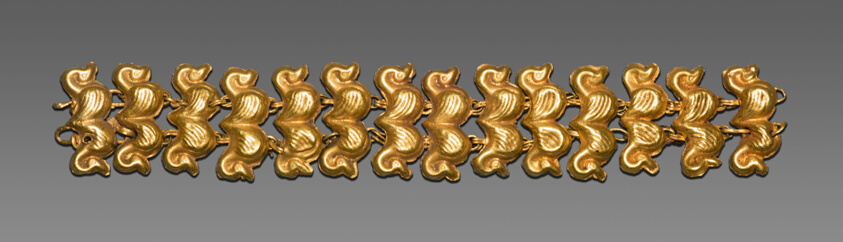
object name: Costume and Accessories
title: Fragment of a Necklace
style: greco-roman (egyptian), ancient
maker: Roman; probably Egypt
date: 3rd century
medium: Gold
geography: Roman Empire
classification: necklace; gold; fragment; metal; jewelry; ancient art; costume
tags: beauty, rituals